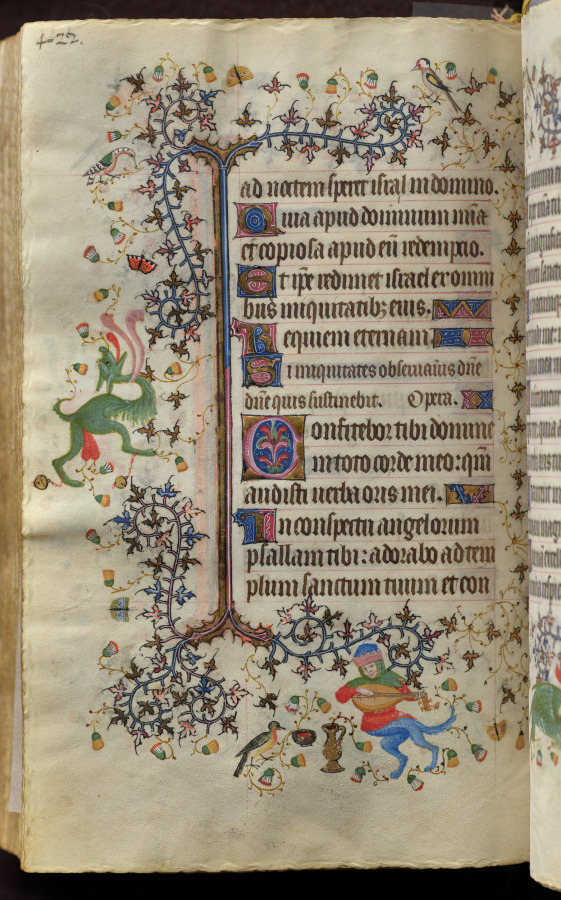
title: Hours of Charles the Noble, King of Navarre (1361-1425): fol. 205v, Text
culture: France, Paris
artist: Master of the Brussels Initials and Associates (French)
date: c. 1405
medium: ink, tempera, and gold on vellum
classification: Bound Volume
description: This precious volume was obviously highly prized by its owner, the French-born King of Navarre, who had his coat of arms painted on no less than twenty folios. Rather than directly commissioning this manuscript from a specific workshop, it seems that Charles the Noble acquired his book of hours -- perhaps ready-made for the luxury market -- while on a trip to Paris in 1404-05. A collaborative effort, six painting styles are evidenced within the pages of this codex, those of two Italians, two Frenchmen, and two Netherlanders. The painter who was responsible for the planning and decoration of the book, and who produced seventeen of the large miniatures, was a Bolognese artist known as the Master of the Brussels Initials. His principal assistant, responsible for most of the borders, was a Florentine who signed his name "Zecho" da Firenze on folio 208 verso.